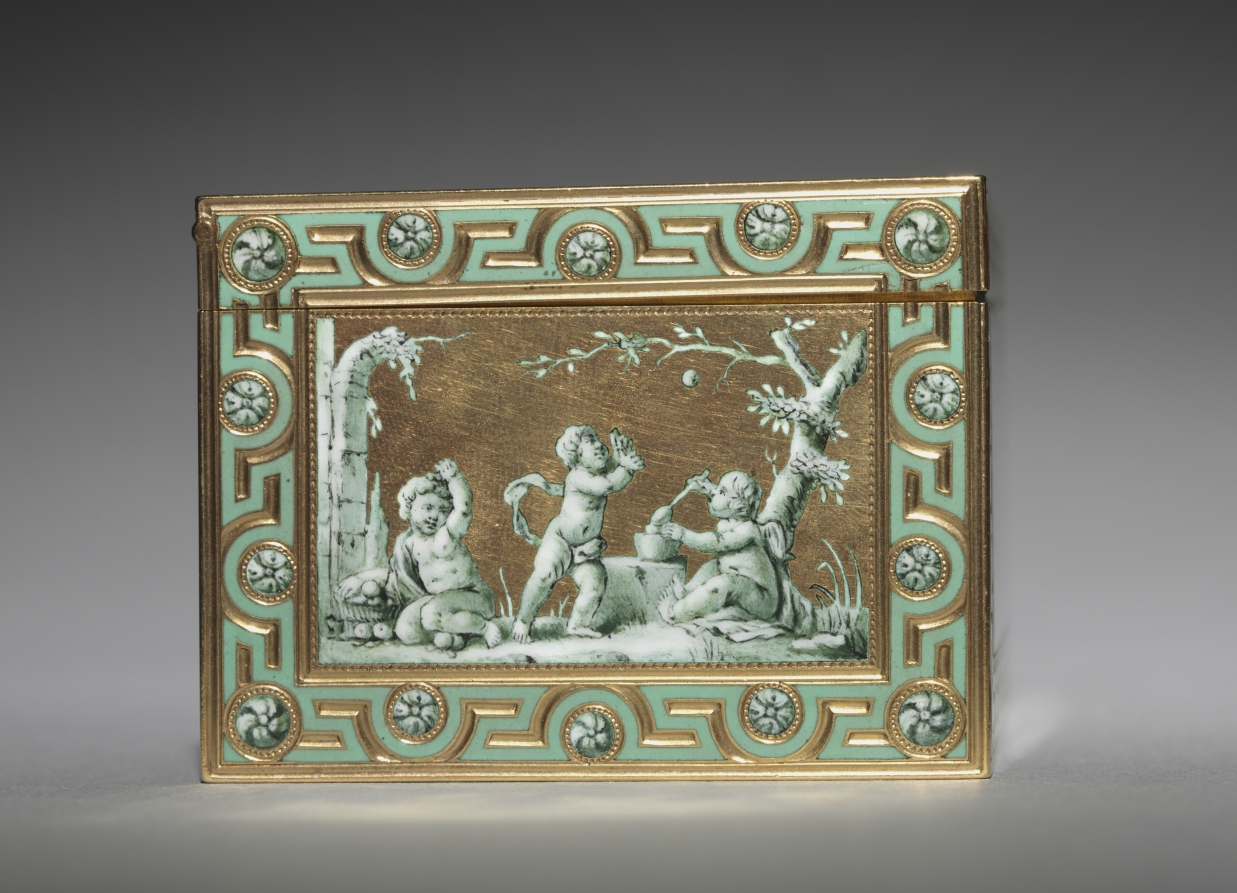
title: Box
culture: France, 18th century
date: c. 1768–1769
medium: gold and enamel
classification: Enamel